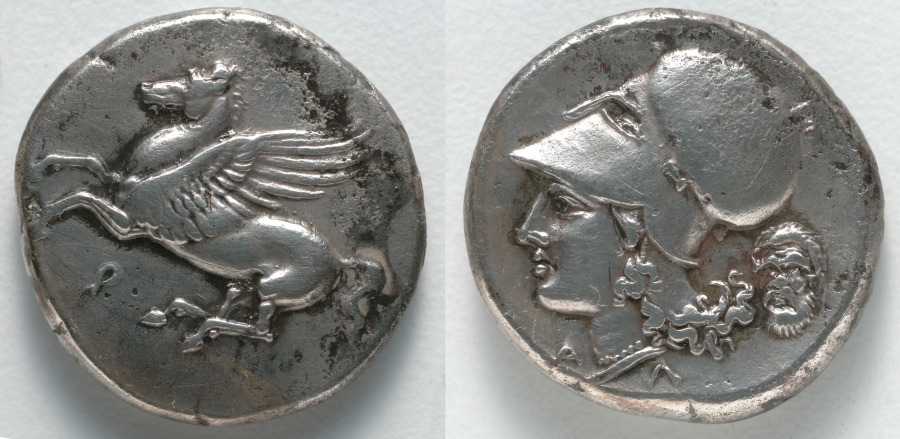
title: Stater: Pegasos (obverse); Head of Athena (reverse)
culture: Greece, Corinth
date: c. 350–338 BCE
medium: silver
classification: Coins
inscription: Ϙ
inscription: Α | Λ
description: On the obverse of this coin, the divine winged horse Pegasos takes flight, its front legs rearing up to the left. On the reverse, Athena, who gave the Corinthian hero Bellerophon the reins to tame Pegasos, wears a Corinthian-style helmet and is accompanied by a mask of the satyr-god Silenos. Repeated in this coinage, the story of Pegasos became an integral part of Corinthian mythology.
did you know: The archaic letter Ϙ, koppa, on the obverse abbreviates the early spelling of Corinth (ϘΟΡΙΝΘΟΣ).